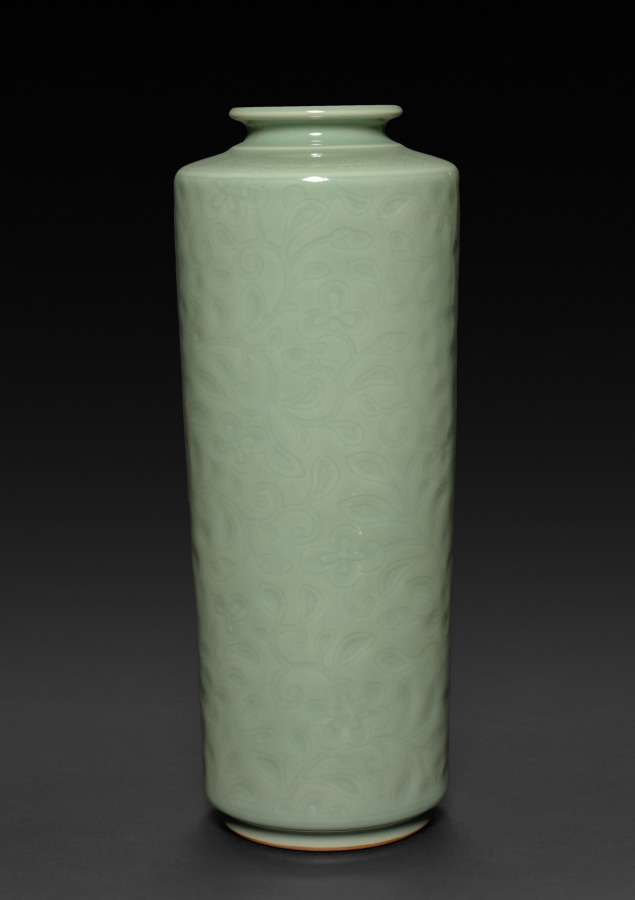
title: Tong-Shaped Vase with Flowers and Grasses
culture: Japan, Taishō period (1912–26) or Shōwa period (1926–89)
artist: Seifū Yohei IV (Japanese, 1872–1951)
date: 1914–46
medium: Porcelain with molded and carved design and green glaze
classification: Ceramic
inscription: 清風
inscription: 彫画 / 青磁花瓶 / 清風造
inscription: 青磁花瓶 / 彫画 【印】清風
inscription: 清風造 【印】成山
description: Many of the vases created by Yohei III and IV were made with reference to and in emulation of Chinese ceramics in both form and glazing. The vessel type called tongping, pronounced tōbin in Japanese, is tall and cylindrical, like the thick length of bamboo referenced in the shape of the ideograph tong 筒. Unlike the ancient gu, hu, and guan, this form did not emerge in China until the Ming dynasty, and many such vases date to the early Qing dynasty. Two green-glazed vases, CMA 2022.225 by Yohei III and this one by Yohei IV, are interpretations of this form. Yohei III’s version has slightly hunched shoulders and is somewhat wider at the top below the small neck and lip. Yohei IV’s vase is more angular. The wide rack of molded cloud encircling the Yohei III vase rises subtly from very low relief banding above and below it, accentuating the vessel’s rounded edges and complementing the form. In contrast, the allover flower vine pattern on the body and “seven treasures” pattern at the collar of the vase by Yohei IV evokes a garment’s cuffed sleeve, like the common English appellation for this type of vessel—“sleeve vase.”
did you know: Seifū Yohei IV continued to create works in the studio’s signature colors but also produced pieces with strong color and flare that were his interpretations of Qing dynasty (1644–1911) glazes.